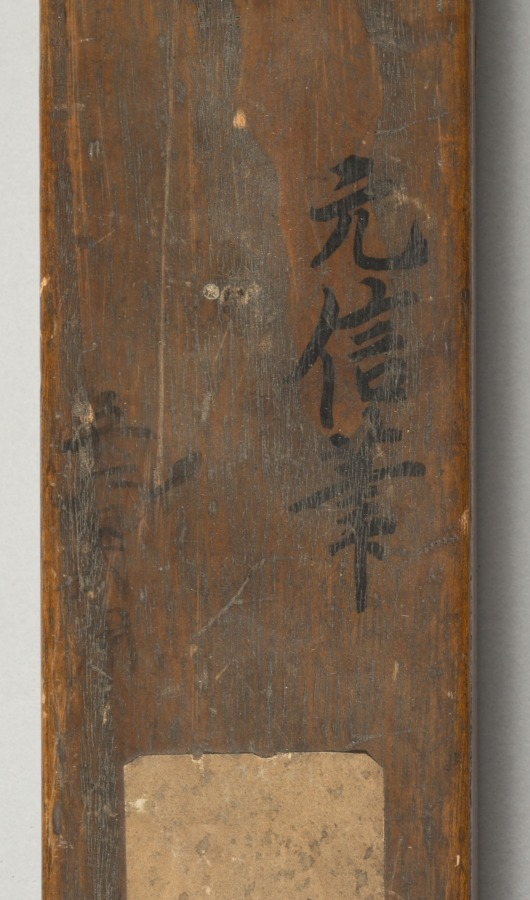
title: Ducks and Reeds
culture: Japan, Momoyama period (1573-1615) to Edo period (1615-1858)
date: early 1600s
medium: hanging scroll; ink on paper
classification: Painting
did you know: This painting was produced by a member of the Kano school.